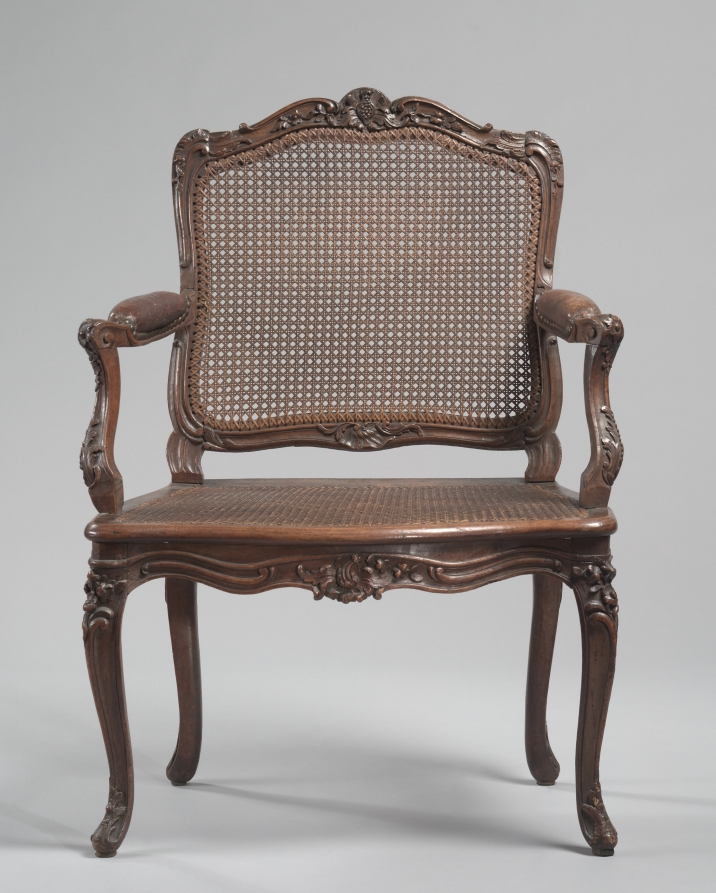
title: Armchair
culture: France, 18th century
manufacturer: René Cresson (French, c. 1705–c. 1749)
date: c.1740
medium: carved wood, cane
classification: Furniture and woodwork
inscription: signed underneath on strip across back: "CRESSON LAINE" (the trademark for René Cresson).